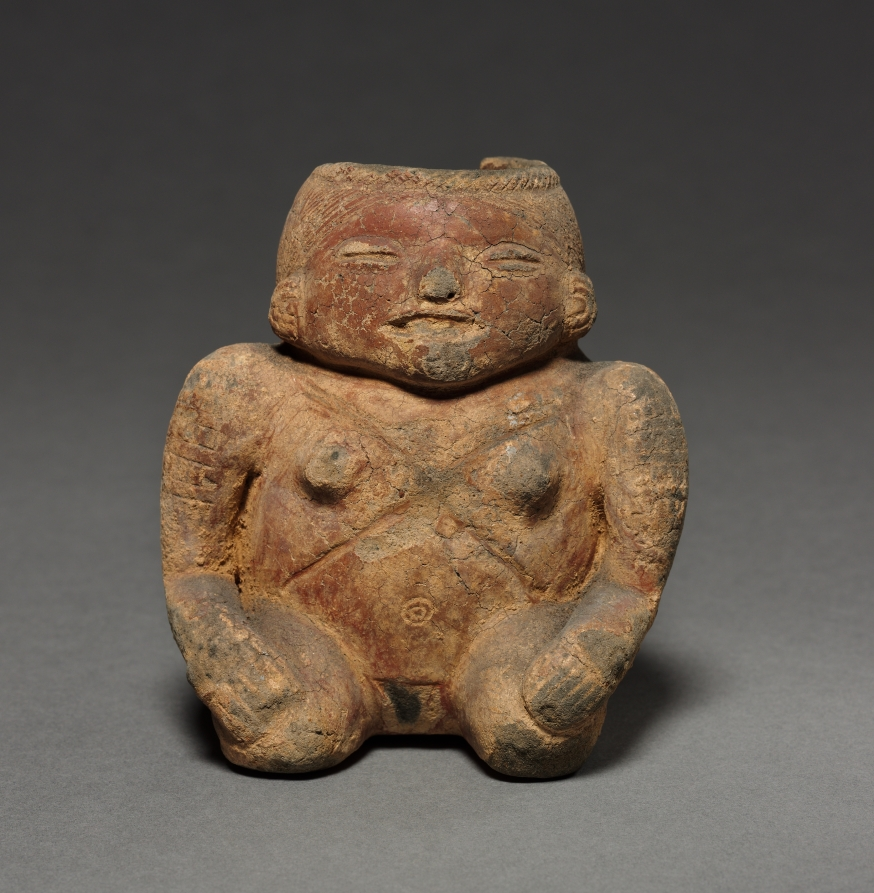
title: Figure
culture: Colombia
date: before 1550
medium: red ware with incised patterns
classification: Ceramic